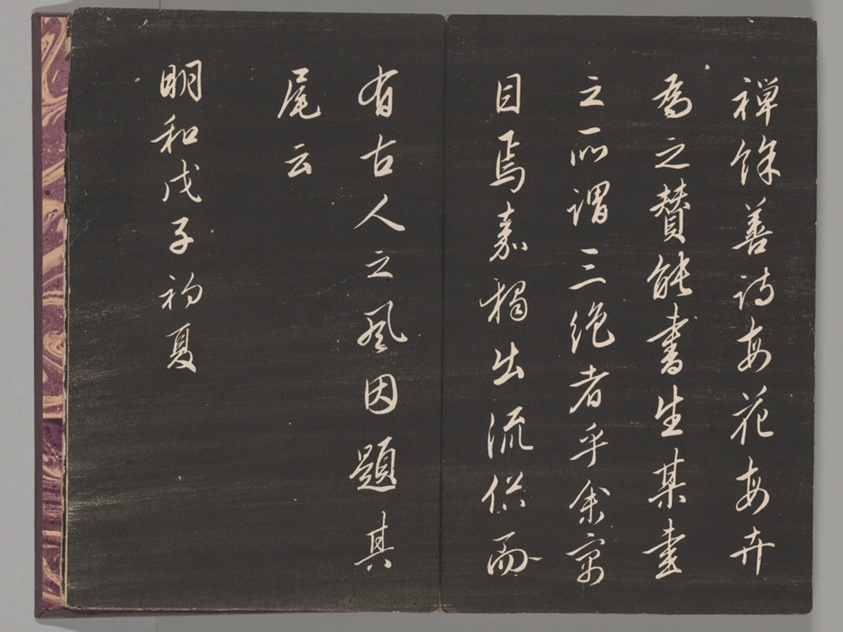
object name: Book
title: Soken sekisatsu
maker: Ito Jakuchu (Japanese, 1716-1800)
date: 1767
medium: Woodblock printed book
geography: Japan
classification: book